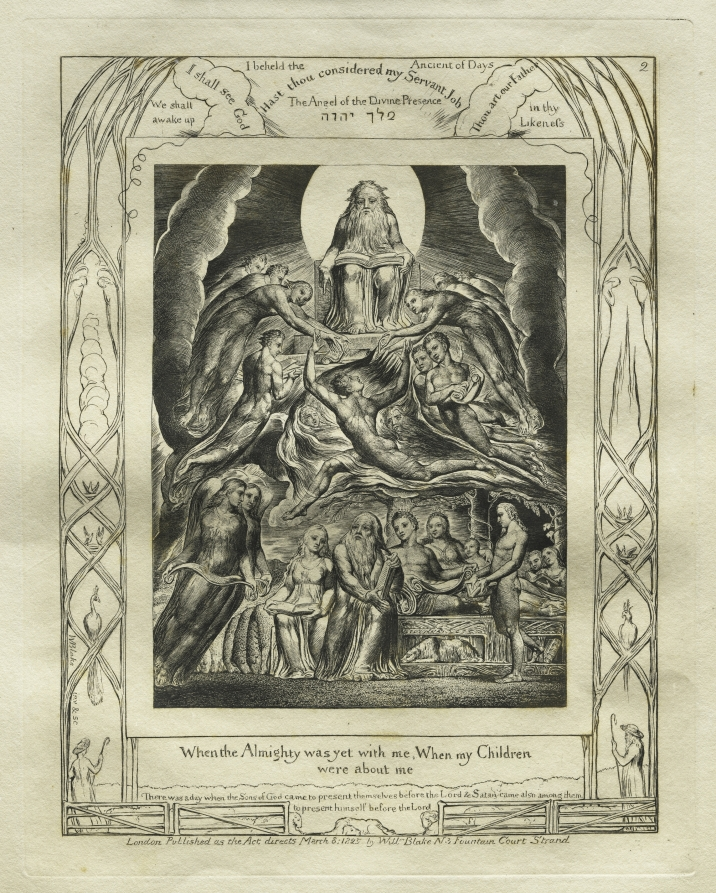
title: The Book of Job: Pl. 2, When the Almighty was yet with me, When my Children / were about me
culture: England, 19th century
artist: William Blake (British, 1757–1827)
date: 1825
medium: engraving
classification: Print